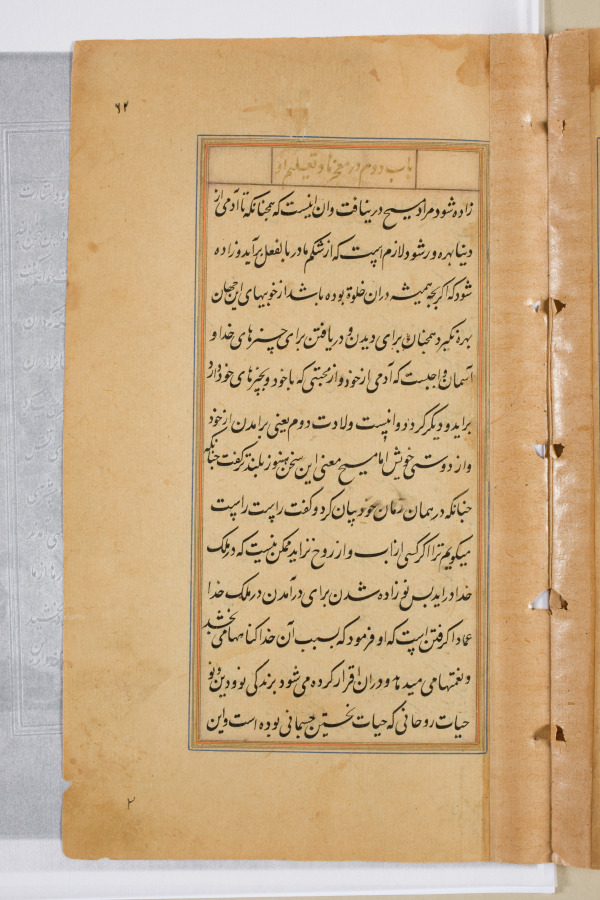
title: Text page from a Mirror of Holiness (Mir’at al-quds) of Father Jerome Xavier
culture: Mughal India, Allahabad, made for Prince Salim (1569–1627)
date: 1602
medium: Ink and gold on paper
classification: Manuscript